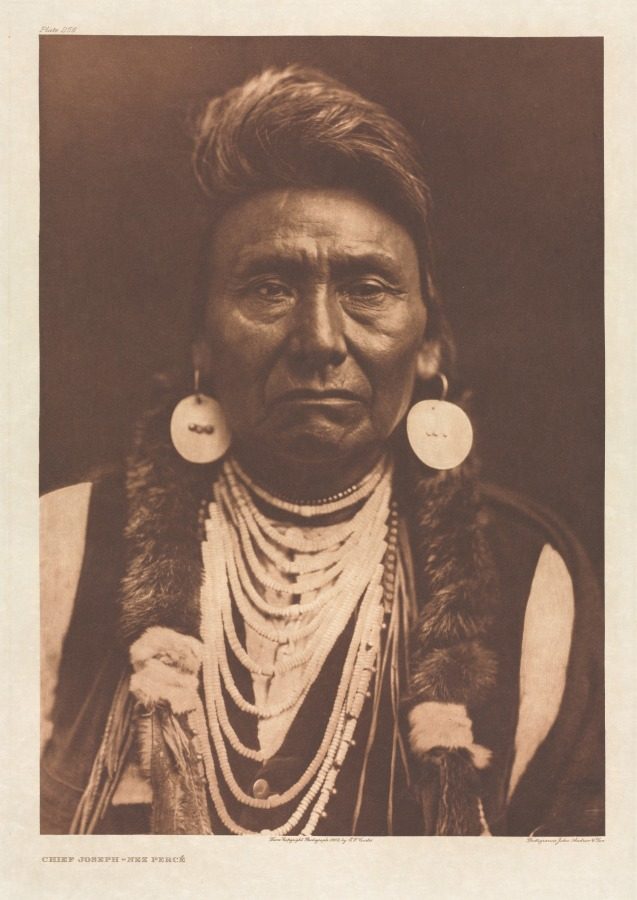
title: Portfolio VIII, Plates 256- 292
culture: America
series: The North American Indian: being a series of volumes picturing and describing the Indians of the United States, The Dominion of Canada, and Alaska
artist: Edward S. Curtis (American, 1868–1952)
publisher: The University Press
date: 1899–1910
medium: photogravure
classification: Portfolio